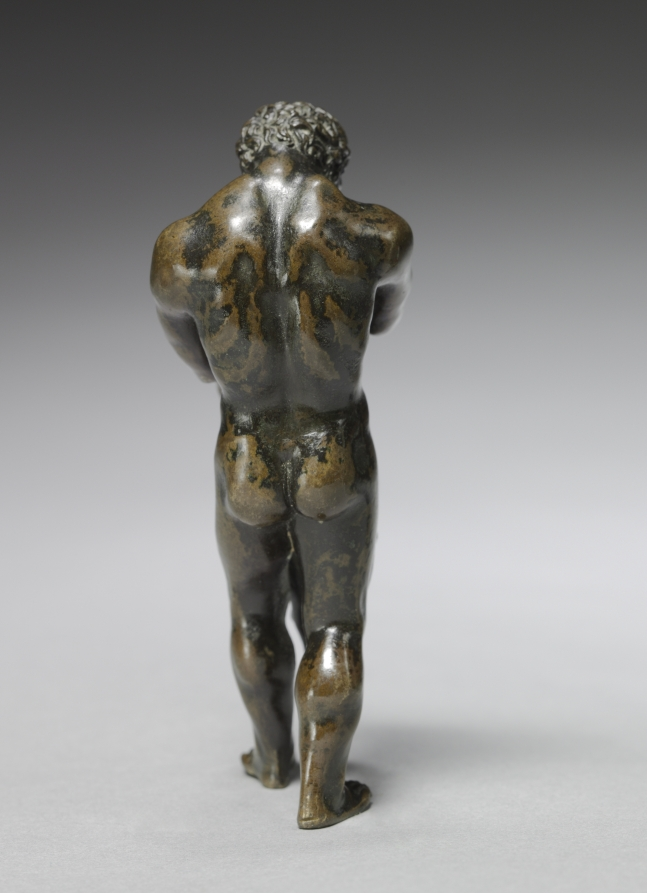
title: Hercules and the Nemean Lion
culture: Italy or France, 16th century or later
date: 1500s or later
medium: bronze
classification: Sculpture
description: The original owner of this work would have understood that this scene referred to the entire story of Hercules, the demi-god who had to accomplish twelve labors. The lion is named after the city of Nemea, near Corinth, a monstrous beast sent by the goddess Hera to wreak havoc on the area. After killing the lion, Hercules wore his pelt, commonly seen in other representations of the hero.